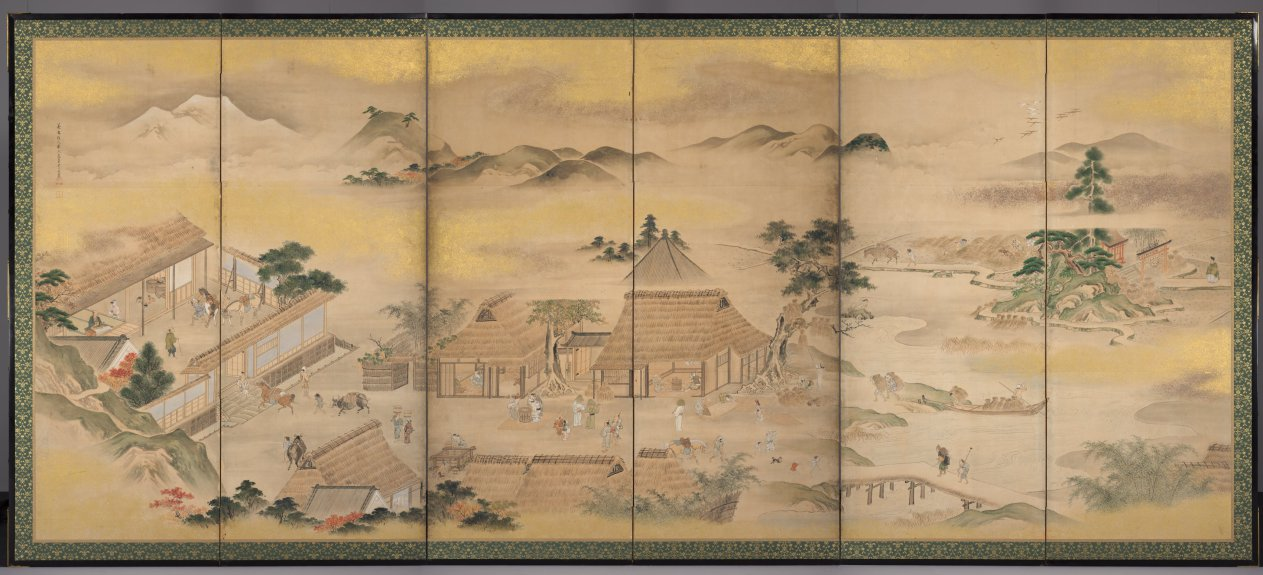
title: Spring and Autumn Farming (Autumn)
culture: Japan, Edo period (1615–1868)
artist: Kō Sūkoku (Japanese, 1730–1804)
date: 1700s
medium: Six-panel folding screen, ink, light color, gold, and silver on paper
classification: Painting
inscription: Signature of the artist: "Enrin san jin Rakushisai ko Sukoku ga" (each screen)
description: These screens present the cycle of the farming year, starting with spring at right and ending with fall at left. Close examination of these screens reveals moments of games and amusement, the enjoyment of meals as well as intellectual and spiritual pursuits interspersed among the scenes of cultivating and preparing the rice harvest. The artist Kō Sūkoku is considered the 18th-century heir in style and attitude to Hanabusa Itchō (1652–1724). Itchō’s work incorporated elements from Kano school, ukiyo-e, and literati styles of painting. Kō trained with one of Hanabusa’s pupils, Sawaki Sūshi, who was best known for scenes depicting everyday life and customs.